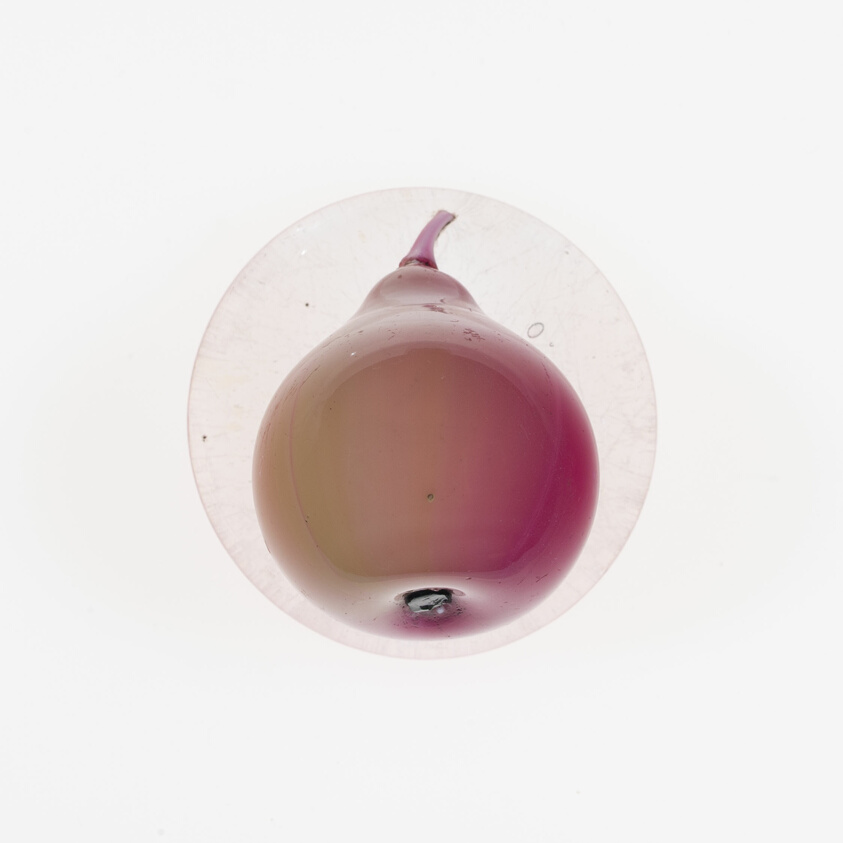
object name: Glass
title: Paperweight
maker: New England Glass Company (Cambridge, Massachusetts, 1818-1888)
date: Late 19th century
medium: Glass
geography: United States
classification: paperweight; glass